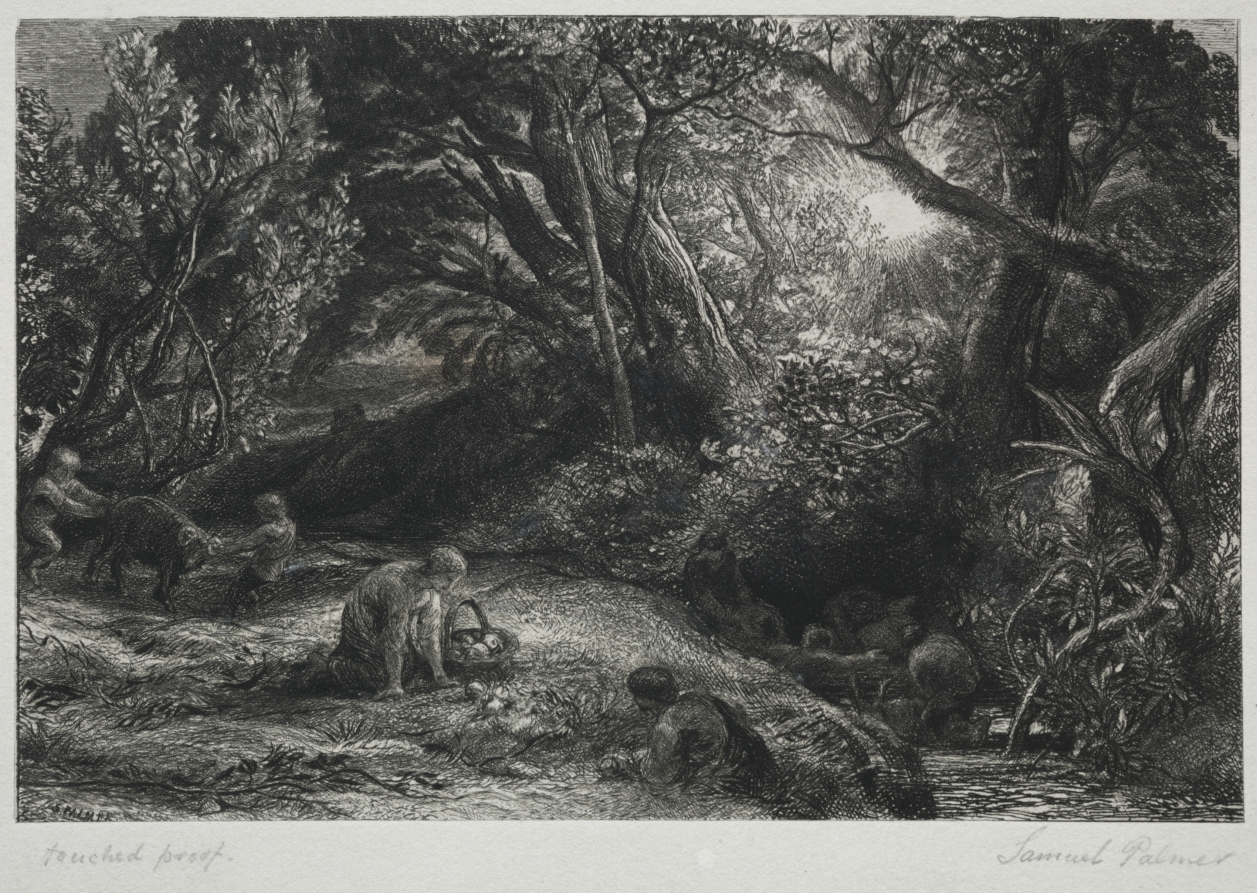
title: The Morning of Life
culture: England, 19th century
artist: Samuel Palmer (British, 1805–1881)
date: 1860–1861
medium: etching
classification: Print